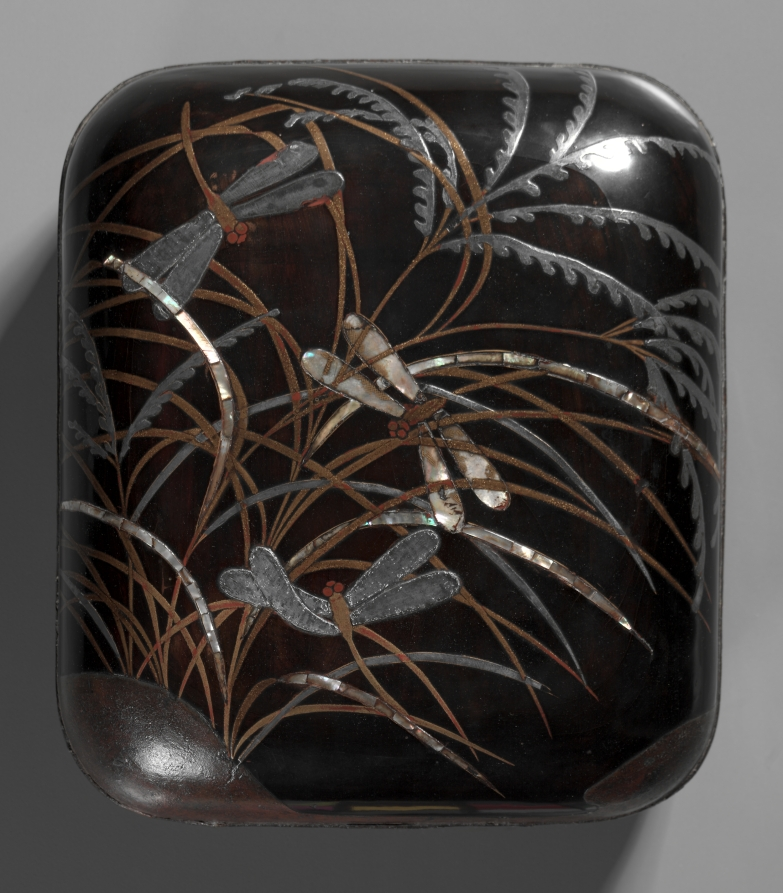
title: Letter Box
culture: Japan, Edo period (1615–1868)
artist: manner of Ogata Kōrin (Japanese, 1658–1716)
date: 1700s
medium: lacquer with pewter and mother-of-pearl inlay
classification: Lacquer